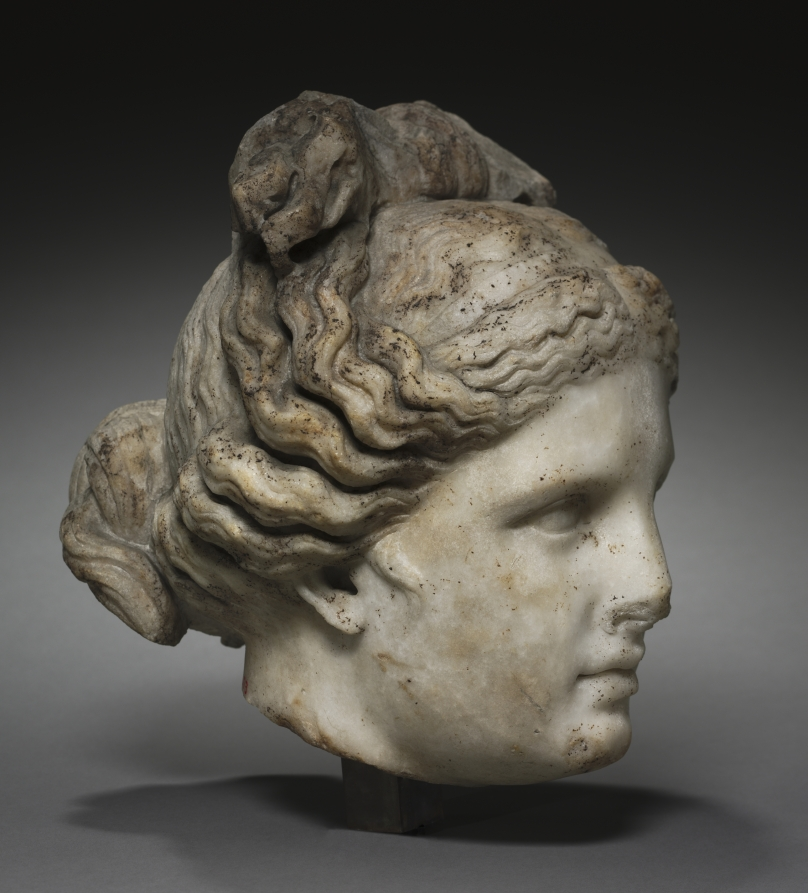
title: Head of Aphrodite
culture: Italy, Roman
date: 100–200 CE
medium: marble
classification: Sculpture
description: With idealized features including a straight nose, small mouth with thick lips, and a hairstyle best known from the so-called Capitoline Venus (now in Rome), this head likely belonged to a full-scale statue of the goddess of love. Like the Capitoline Venus and many other sculptures of the Roman period, it probably showed the goddess nude and bathing, harking back to the groundbreaking sculpture of Aphrodite at Knidos, carved by Praxiteles in the mid-fourth century BC.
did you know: The elaborate hairstyle, arranged in a bow atop the head, identifies this figure as Aphrodite.